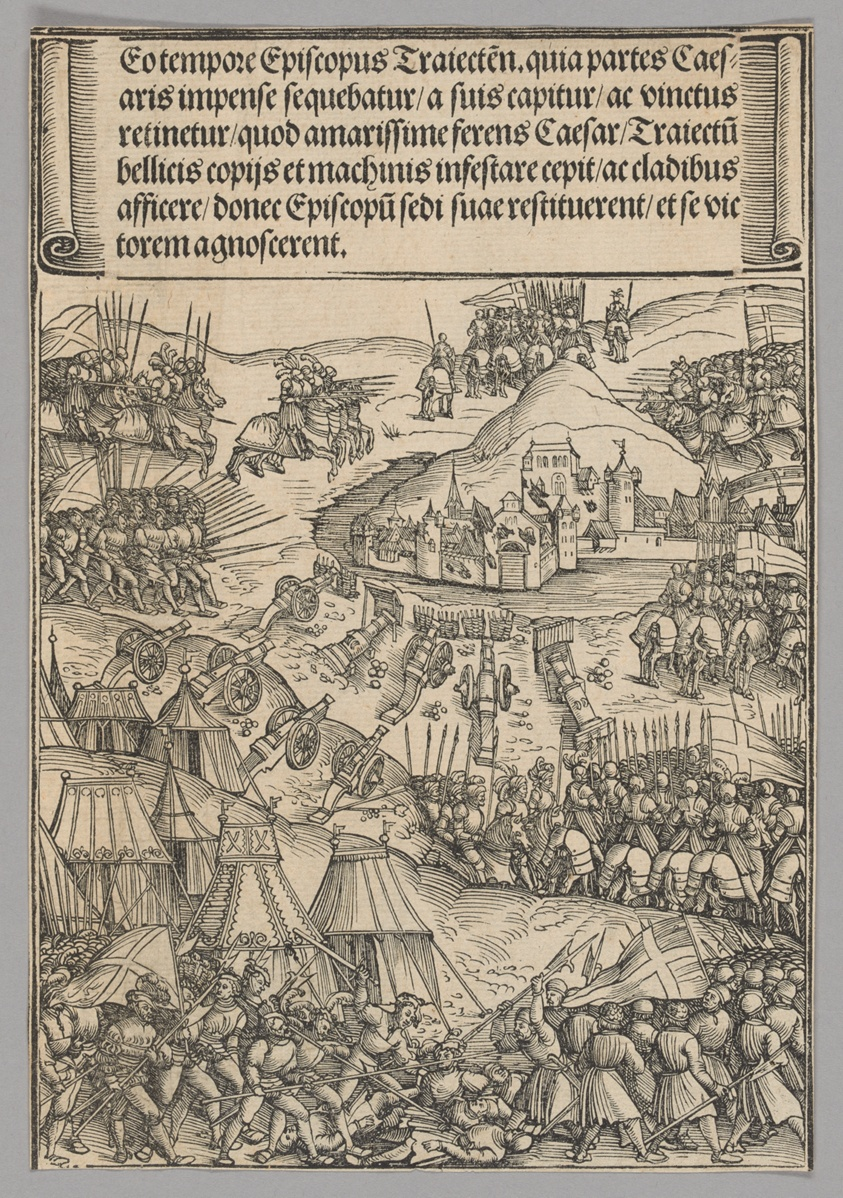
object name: Print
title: Siege of Utrecht, plate 6 from Historical Scenes from the Life of Emperor Maximilian I from the Triumphal Arch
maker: Wolf Traut (German, c. 1480-1520); printed by Hieronymus Andreae (German, died 1556)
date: 1515-17, printed c. 1520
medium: Woodcut in black ink on cream laid paper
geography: Germany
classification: print; paper; woodcut; prints and drawing